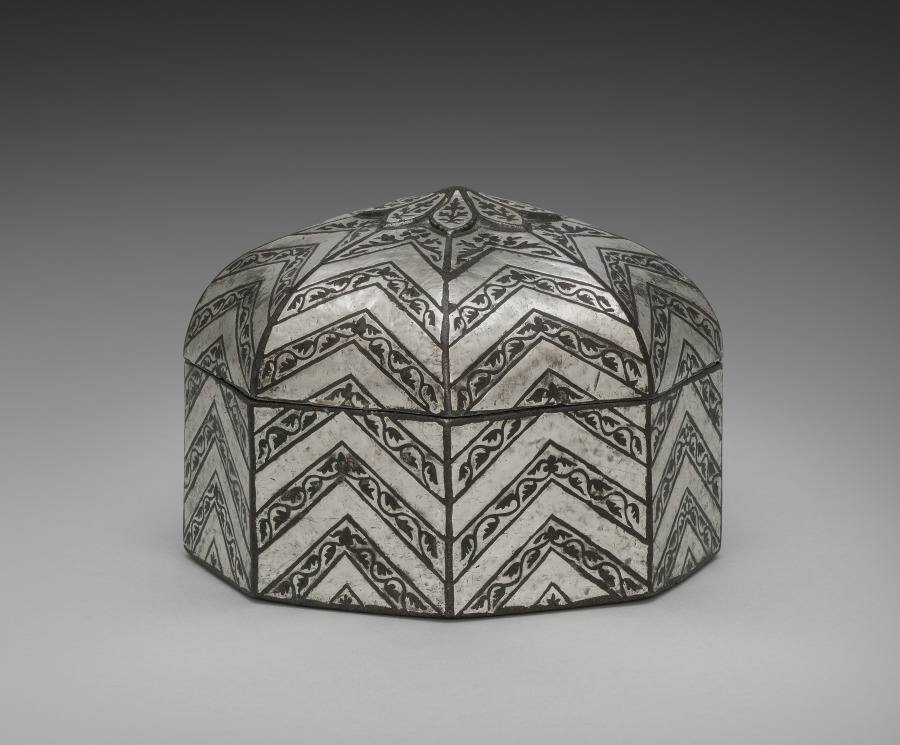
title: Bidri Pandan with Chevrons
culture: Southwestern India, Deccan, Karnataka, Bidar​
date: c. 1700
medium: Zinc alloy with silver overlay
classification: Metalwork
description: A pandan is a lidded vessel for serving paan, which has been enjoyed in India for more than two thousand years. Paan is betel or areca nut mixed with lime powder, aromatics such as clove cinnamon, or cardamom, and wrapped in betel leaf. The whole packet is chewed after a meal as a mild stimulant and mouth freshener.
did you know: The lime powder in paan functioned as an ancient antacid after meals.